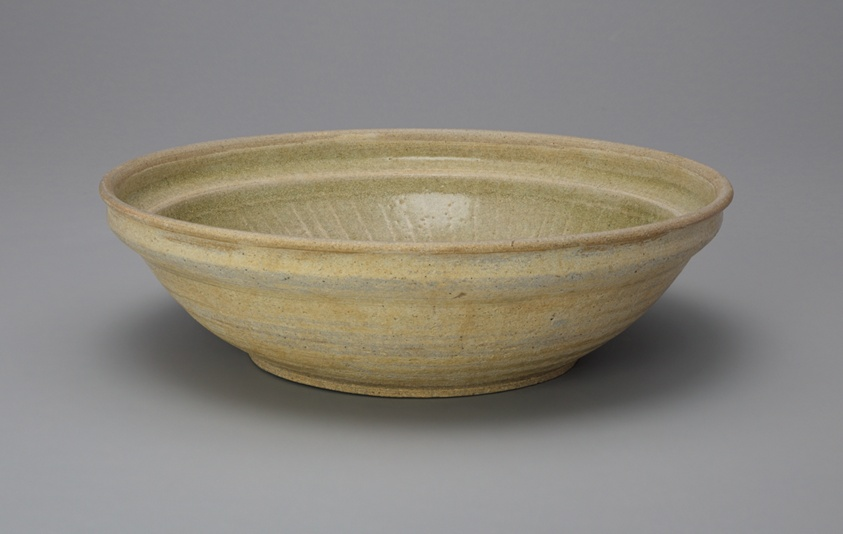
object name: Decorative Arts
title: Dish with Incised Fan Pattern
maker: Thailand, Chiang Mai Province, Sankampaeng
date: 14th century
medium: Stoneware with celadon glaze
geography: Chiang Mai province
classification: stoneware; decorative arts